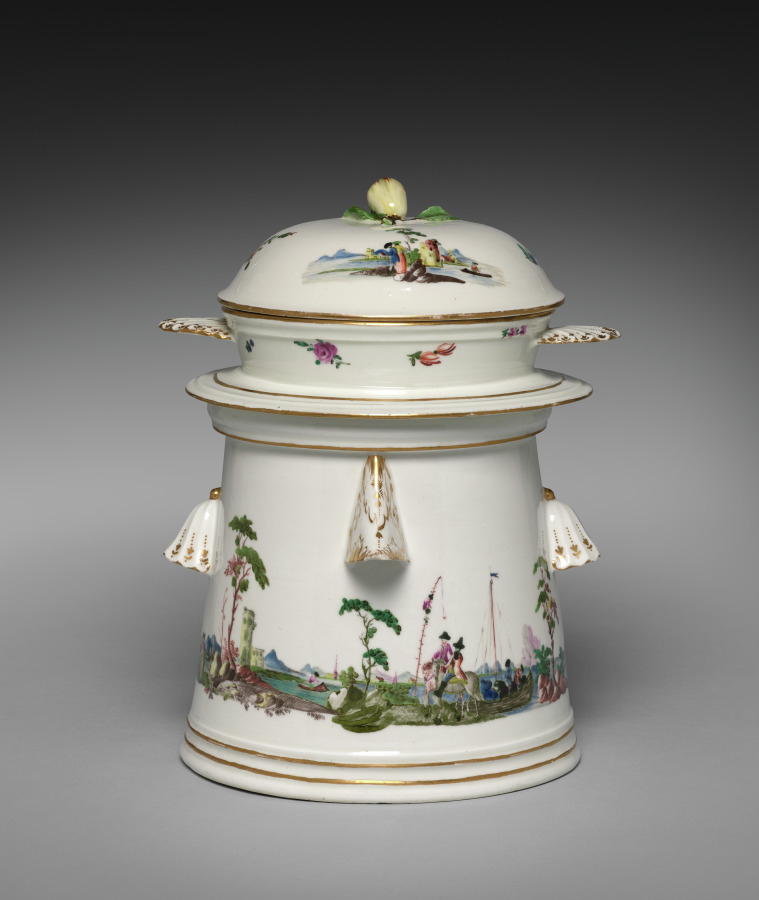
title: Food Warmer (Veilleuse)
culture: Germany, Nymphenburg, 18th century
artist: Nymphenburg Porcelain Factory (German, founded 1747)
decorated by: probably by Georg Christoph Lindemann (German)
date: c. 1758–1760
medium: porcelain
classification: Ceramic